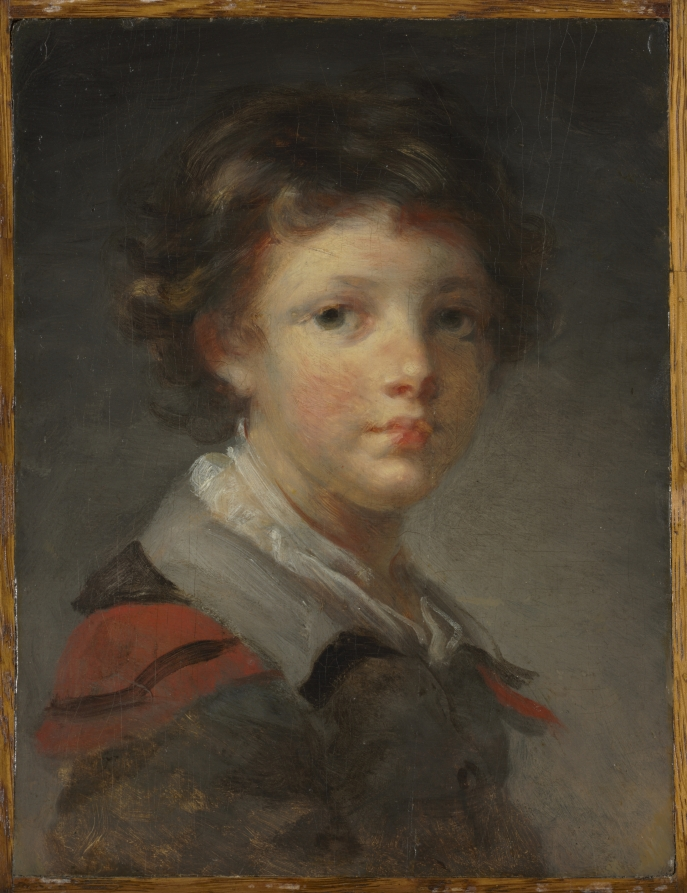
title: A Boy in a Red-lined Cloak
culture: France, 18th century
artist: Jean-Honoré Fragonard (French, 1732–1806)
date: 1780s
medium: oil on wood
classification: Painting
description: In the course of his long career, Fragonard produced more than 550 paintings. In this particular painting, the seventeenth-century costume, the brown palette, and his technique suggest that Fragonard is reflecting upon the work of Peter Paul Rubens and Rembrandt rather than his teacher François Boucher. While there is considerable evidence that the sitter is Alexander Evariste Fragonard, the artist's son, this identity has never been confirmed.